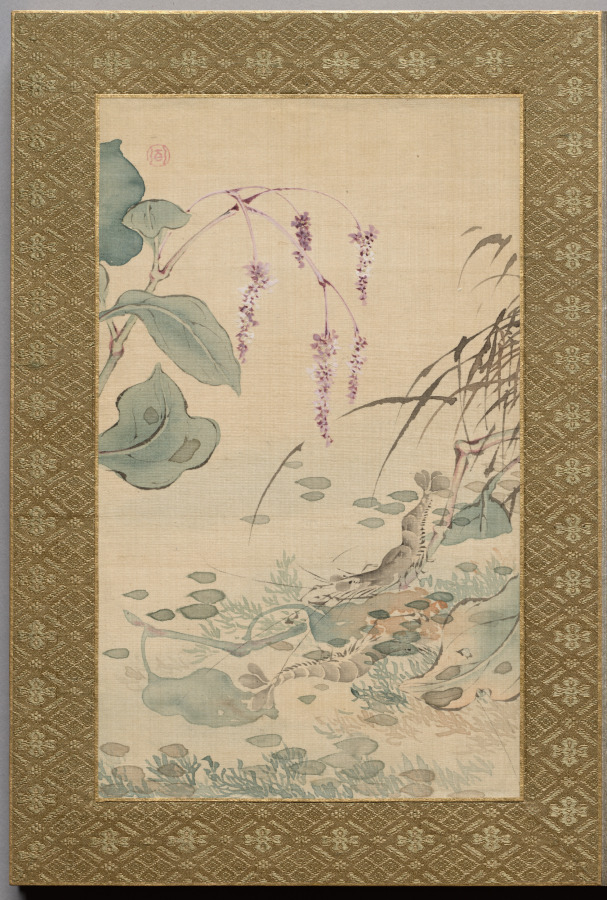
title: Painting from Flowers and Grasses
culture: Japan, Edo period (1615–1868)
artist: Tsubaki Chinzan (Japanese, 1801–1854)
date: 1841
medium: album; ink and color on silk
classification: Painting